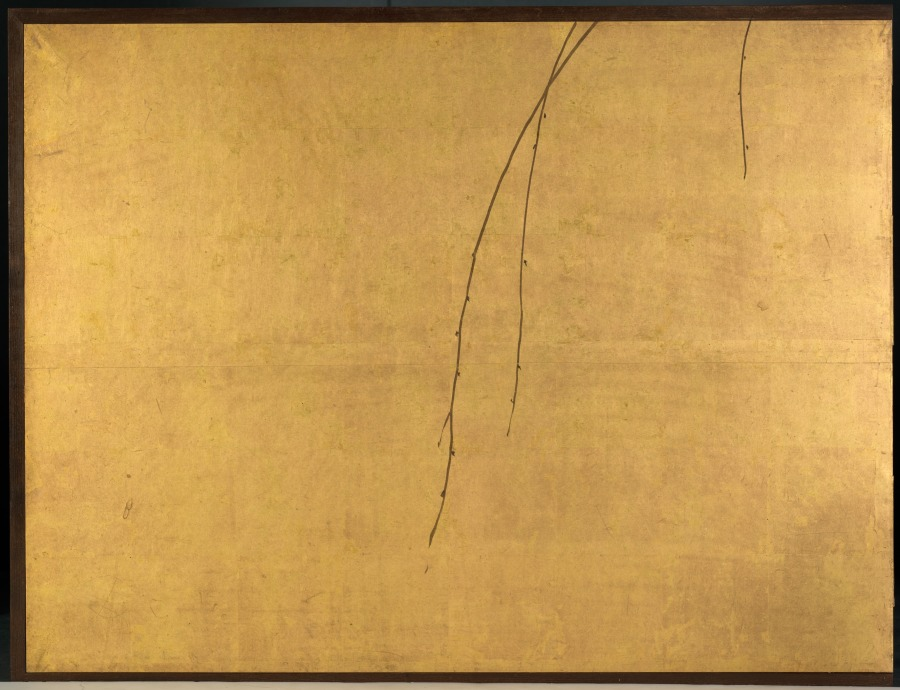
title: Heron on a Willow Branch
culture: Japan, Edo period (1615–1868)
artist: Maruyama Ōkyo (Japanese, 1733–1795)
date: late 1700s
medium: Two-panel folding screen; ink, color, lacquer, and gold on silk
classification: Painting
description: Okyo was the most influential painter and teacher of his time in Kyoto. His mastery of brush and ink found expression in a variety of Chinese and Japanese subjects, painting styles, and formats. This depiction of a heron on a willow branch is done in a classical Japanese painting (yamato-e) style, utilizing flat areas of colorful pigments set against an expansive background with little or no spatial depth.